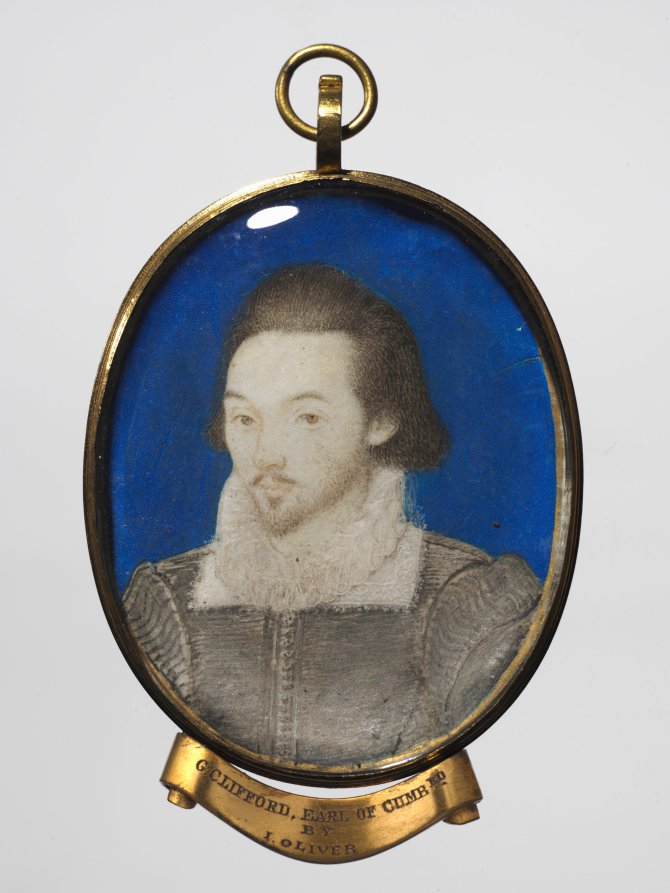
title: Portrait of a Man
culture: England, 17th century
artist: manner of Nicholas Hilliard (English, c. 1547–1619)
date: c. 1600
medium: watercolor on vellum with a gold border in a gilt metal frame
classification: Portrait Miniature